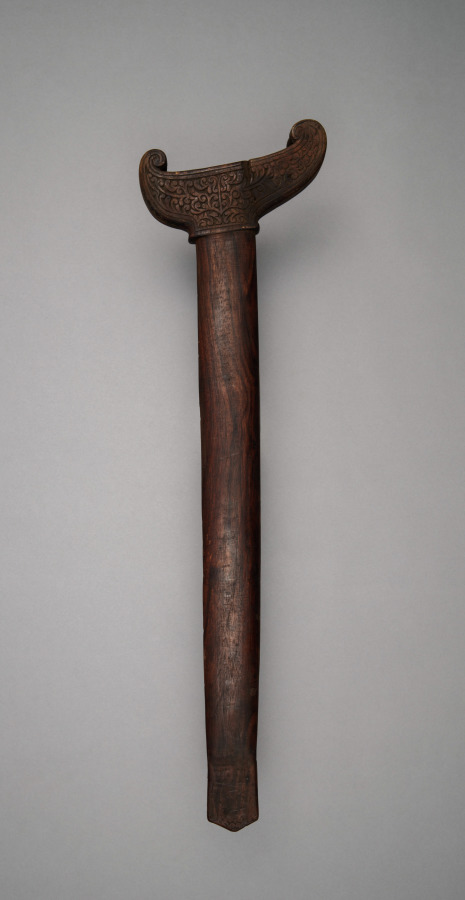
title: Scabbard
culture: Philippines, Mindanao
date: before 1916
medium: Hardwood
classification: Arms and Armor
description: The flaring, boat-shaped upper section of this scabbard is intricately decorated with vegetal scrollwork likely derived from the okir designs typical of the Maranao or Maguindanao people. The lower portion of the sheath is unadorned, highlighting the natural grain of the dark hardwood.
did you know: This sheath was designed to house a double-edged kalis (kris) blade.